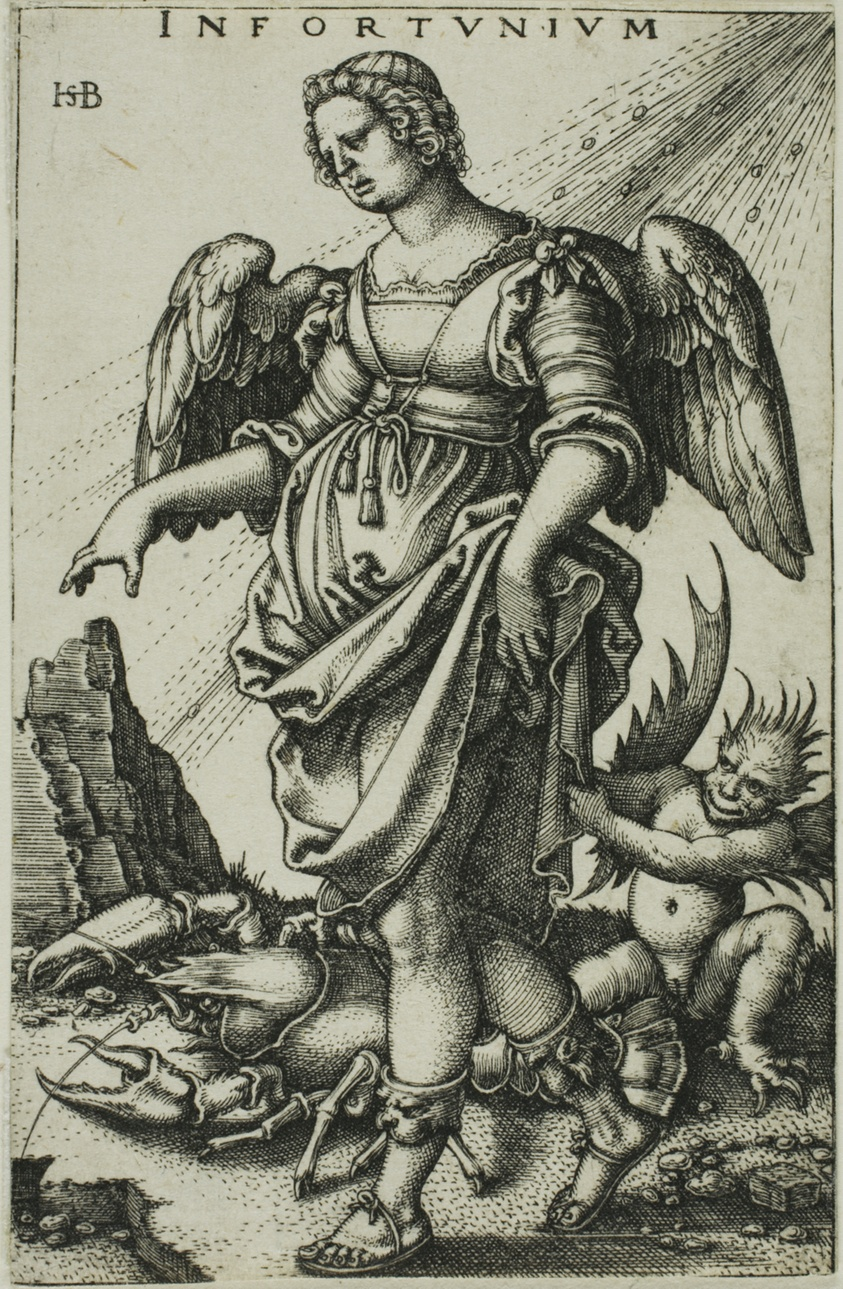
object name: Print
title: Misfortune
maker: Sebald Beham; German, 1500-1550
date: c. 1541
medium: Engraving in black on ivory laid paper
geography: Germany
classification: engraving; print; prints and drawing